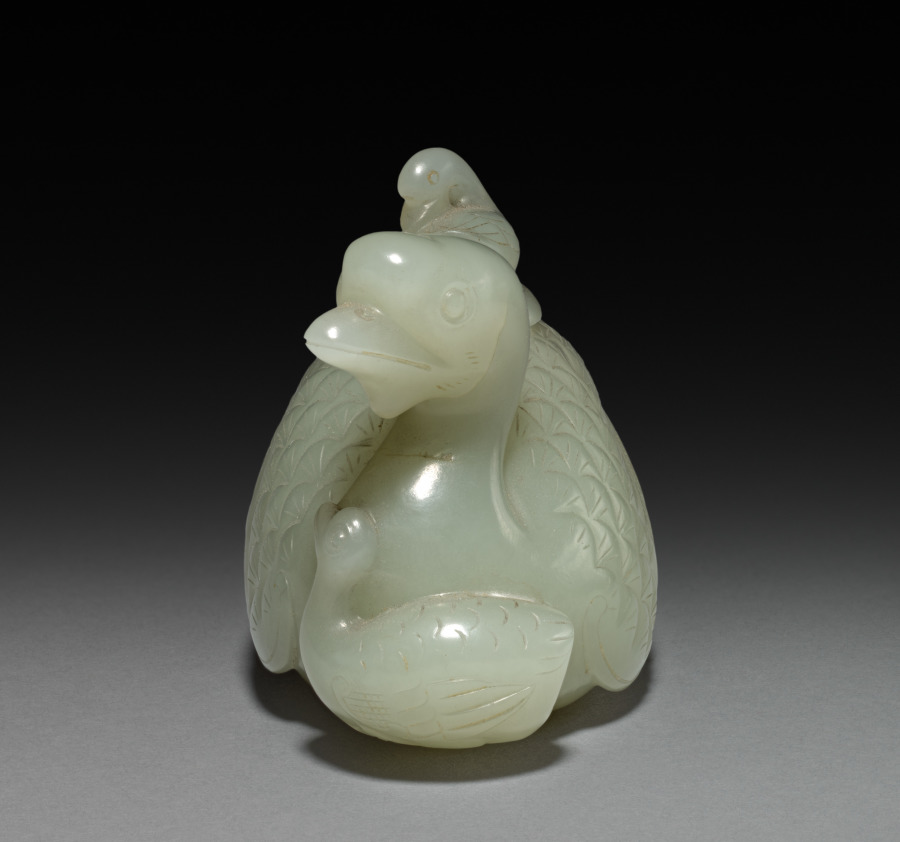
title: Goose and Goslings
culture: China, Qing dynasty (1644-1911)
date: 1700s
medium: jade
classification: Jade